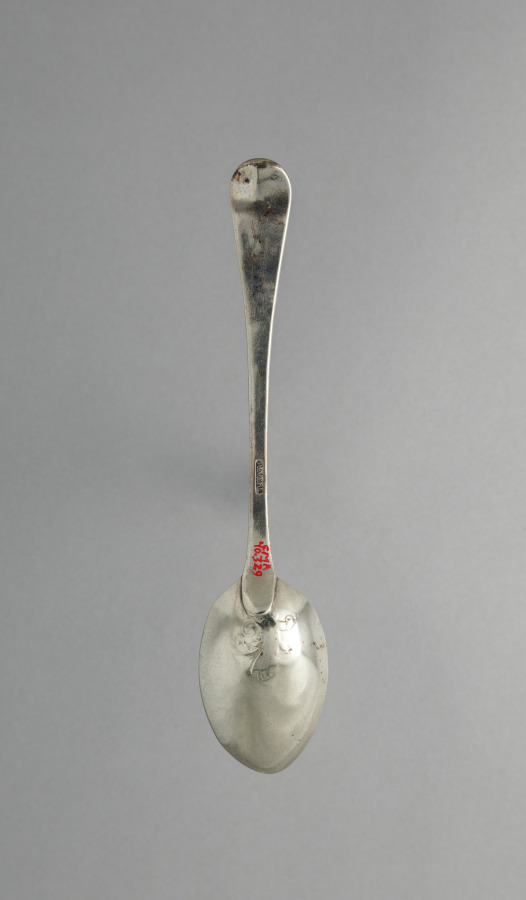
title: Tablespoon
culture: America, Massachusetts, Boston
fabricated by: Paul Revere II (American, 1735–1818)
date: c. 1785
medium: silver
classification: Silver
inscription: engraved: "MM" in bright-cut script on top of handle end.